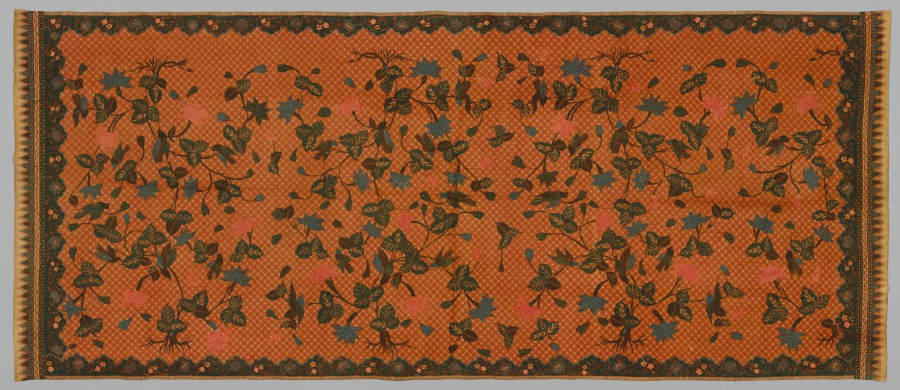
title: Waist Cloth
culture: Indonesia, Java, Samarang, 19th century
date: 1800s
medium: batik; cotton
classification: Textile